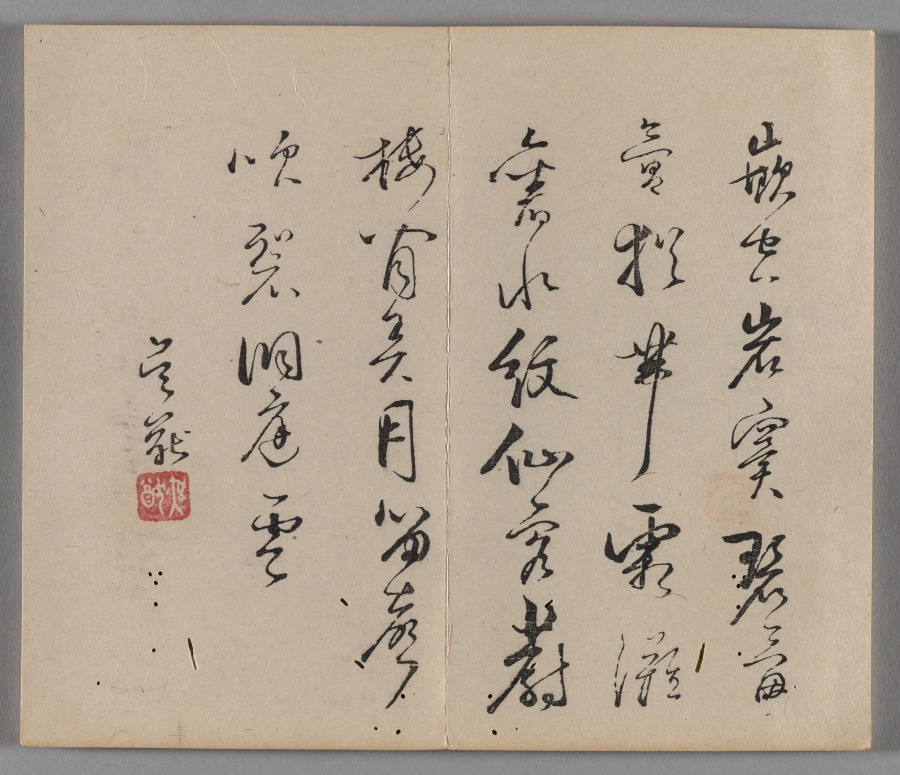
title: Ten Bamboo Studio Painting and Calligraphy Handbook (Shizhuzhai shuhua pu): Rocks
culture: China, Qing dynasty (1644-1911)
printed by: Hu Zhengyan (Chinese, c. 1584–1674)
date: 1633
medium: Woodblock-printed book; ink and colors on paper; first edition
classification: Print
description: Color printing reached a level of perfection in the early 1600s, as seen in this Ten Bamboo Studio Collection of Calligraphy and Painting and the Mustard Seed Garden Manual of Painting (printed 1679 and 1701). The painterly quality, precision in registering (aligning) the woodblocks, and harmonious colors made them the most successful color print editions in Chinese history. Both editions were printed and compiled in Nanjing, spread nationwide, and had a great impact on the arts in Japan and Korea.